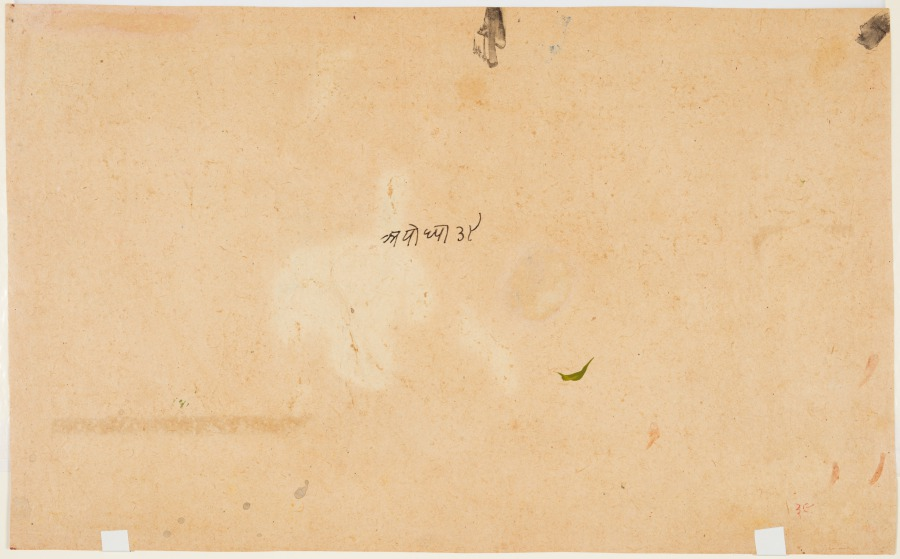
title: Queen Kaikeyi reminds King Dasharatha about the sacrifices of King Bali and King Shivi, folio 39 from the Ayodhya Kanda (Book of Ayodhya) of a Ramayana (Rama's Journey)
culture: Northwestern India, Rajasthan, Rajput Kingdom of Mewar, Court of Amar Singh II (reigned 1698–1710)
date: c. 1710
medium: gum tempera, ink, and gold on paper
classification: Painting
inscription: [[recto]] ayo[dhyā kāṃda]. ṛāmāyana ro patra. 39. pache rājā bilāpa kari mūrchā pai jadi kekaī bolī dhartī para kyo sutā saṃcī bāta upara rahoṃ or suṃnoṃ rājā alaraka śivī ara rājā bali yā sāmca upara sarba dīyo yā bāta suni rājā homa kara bāvālā kīsī nāī khed pāctouva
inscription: [[verso]] ayodhaya, 39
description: A large portion of this composition is dominated by the episode of Vishnu’s manifestation as Trivikrama in Raja Bali’s sacrifice. Vishnu stands monumentally with his one foot on the ground and the other foot reaching to heaven where Brahma washes Vishnu’s foot with Ganges water in devotion. Raja Bali is shown giving the sacrifice to Vamana, the brahmin incarnation of Vishnu.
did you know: The scenes outside the room illustrate and expand further on what the queen, at left, is saying.